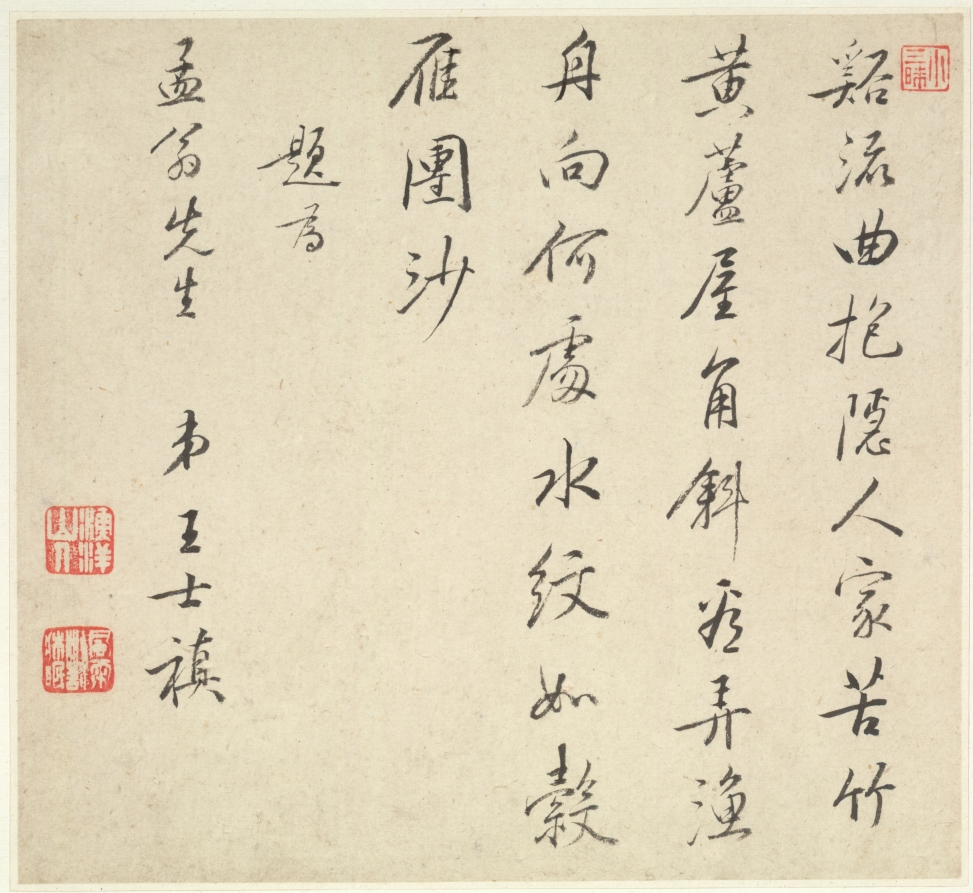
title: Album of Landscapes: Leaf 2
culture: China, Qing dynasty (1644-1911)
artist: Wang Gai (Chinese, active c. 1677–1705)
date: 1677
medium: album leaf, ink and light color on paper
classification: Painting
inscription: Poem by Wang Shih-chen